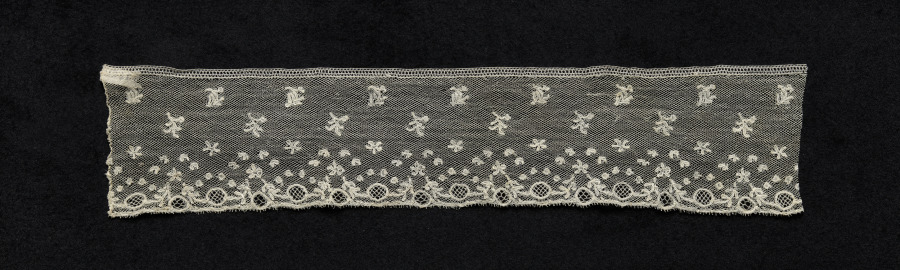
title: Lace Edging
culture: Belgium, Mechelen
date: 1780–1800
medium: Bobbin lace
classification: Lace